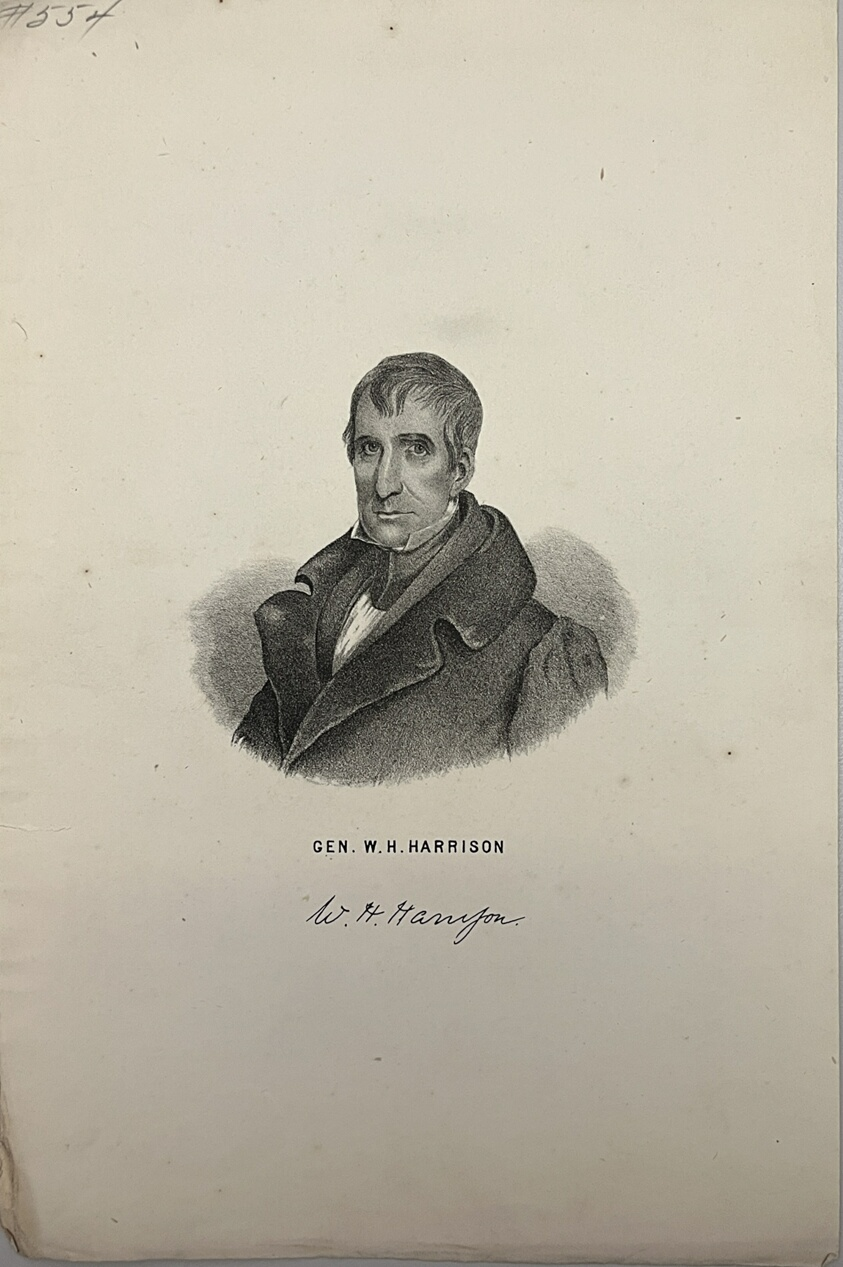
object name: Print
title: General W.H. Harrison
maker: Artist Unknown (Likely American, 19th century)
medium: Stipple etching on paper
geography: United States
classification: reproduction; print; prints and drawing